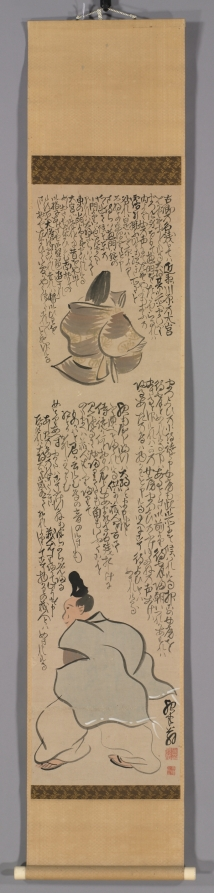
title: Moon Viewing, from The Tale of Heike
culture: Japan, Edo period (1615–1868)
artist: Yosa Buson (Japanese, 1716–1783)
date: 1700s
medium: hanging scroll; ink and light color on paper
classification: Painting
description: Drawing from Japanese literature, Yosa Buson copied almost the entire text of the “Moon Viewing” episode from The Tale of the Heike, a story of the rise and fall of the Taira family. The two characters he painted were given nicknames based on 31-syllable waka poems they composed. Seen from behind at the top is Matsuyoi, or “Waiting at Nightfall,” while the person striding below is Mono ka wa Kurando, roughly equivalent to “‘It’s Nothing’ Chamberlain.”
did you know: The Tale of the Heike is a great historical romance written around 1240.